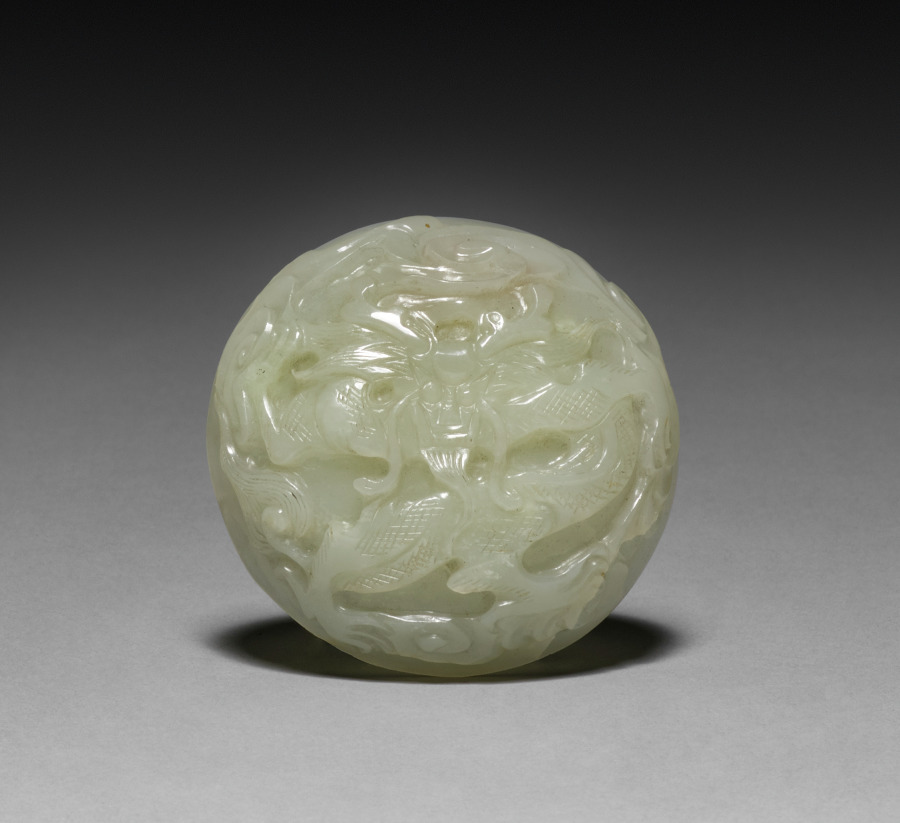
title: Box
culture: China, Qing dynasty (1644-1911)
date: 1644–1911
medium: jade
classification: Jade